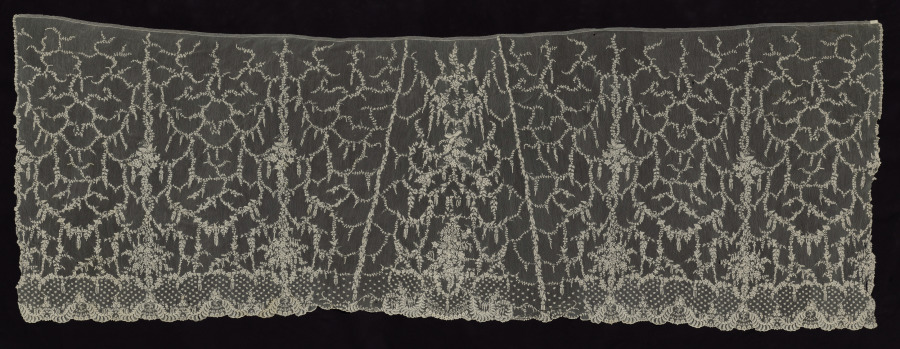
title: Lace Flounce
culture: France, Alençon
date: 1840–60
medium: Needle lace (Point d'Alençon)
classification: Lace